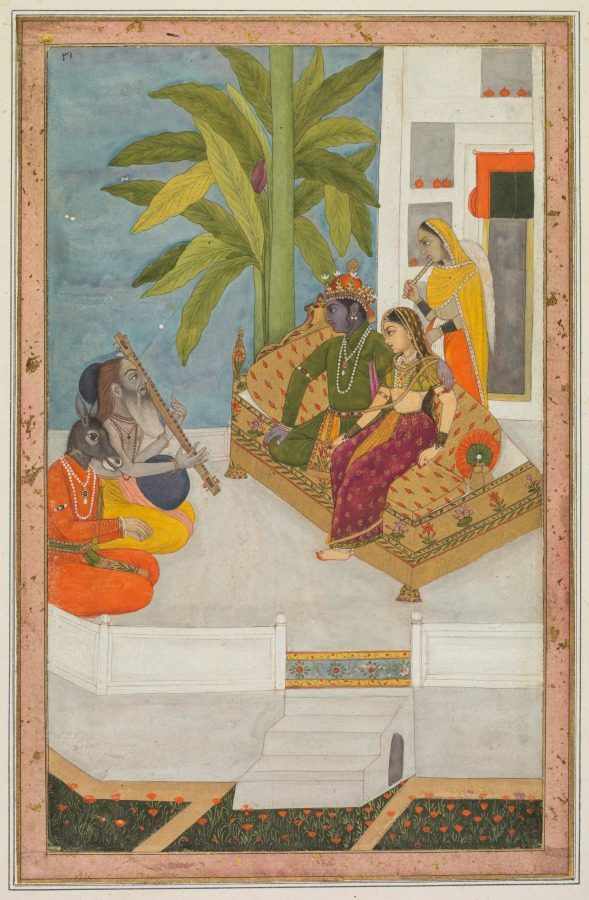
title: Shri Raga: An Illustration from a Ragamala Series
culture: India, Mughal, 18th century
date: c. 1740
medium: Gum tempera and gold on paper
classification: Painting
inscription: Inscription at top, Persian numerals: 31; Persian inscriptions on verso, in nasta‘liq script: 31 Sixth, Shri Raga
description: The verse associated with Shri Raga corresponds closely with this scene: His body, bluish in hue, is marvelously built. He is always graced with the company of auspicious Shri Lakshmi. He sits on a throne of gold, and before him Narada sits playing on his vina. He has decorated himself with garlands of flowers, and also with ornaments set with jewels. Shri raga is thus conceived in sentiment, of whom all learned men sing praises. The horse-headed figure claps his hands and accompanies the sage, wearing saffron garments and playing on the stringed instrument called a vina. He may be derived from the courtly commander of Indra, seen in the Jain manuscripts. Poppies bloom in the formal garden below the pure white terrace, and they are echoed by the oranges set on the windows of the house at the upper right.